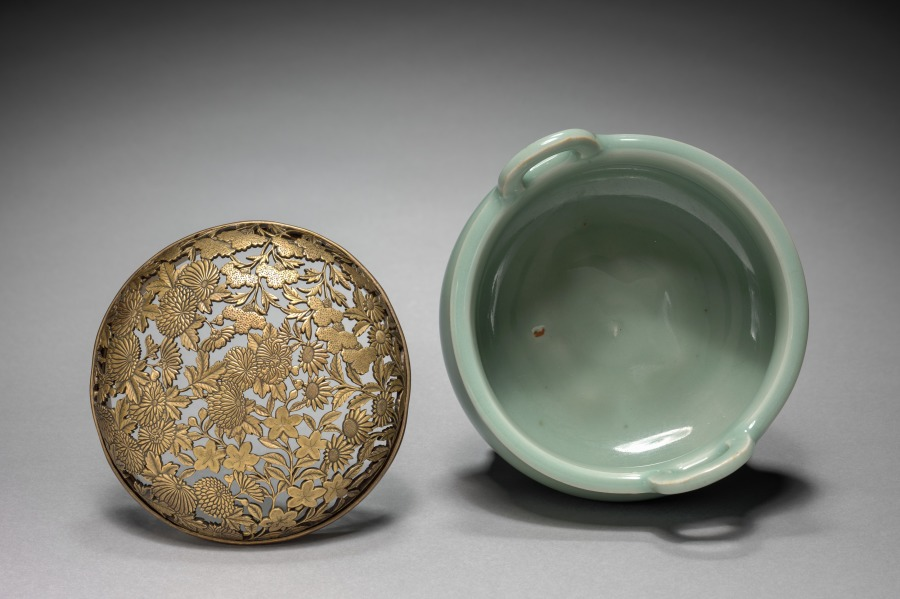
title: Covered Incense Burner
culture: Japan, Meiji period (1868–1912)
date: late 1800s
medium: Porcelain with gilt bronze cover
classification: Ceramic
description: This incense burner emulates Chinese porcelain in its glaze and form. A number of prominent Meiji-period ceramicists explored classical Chinese forms and glazes even as they also produced stoneware with Japanese-style glazes.